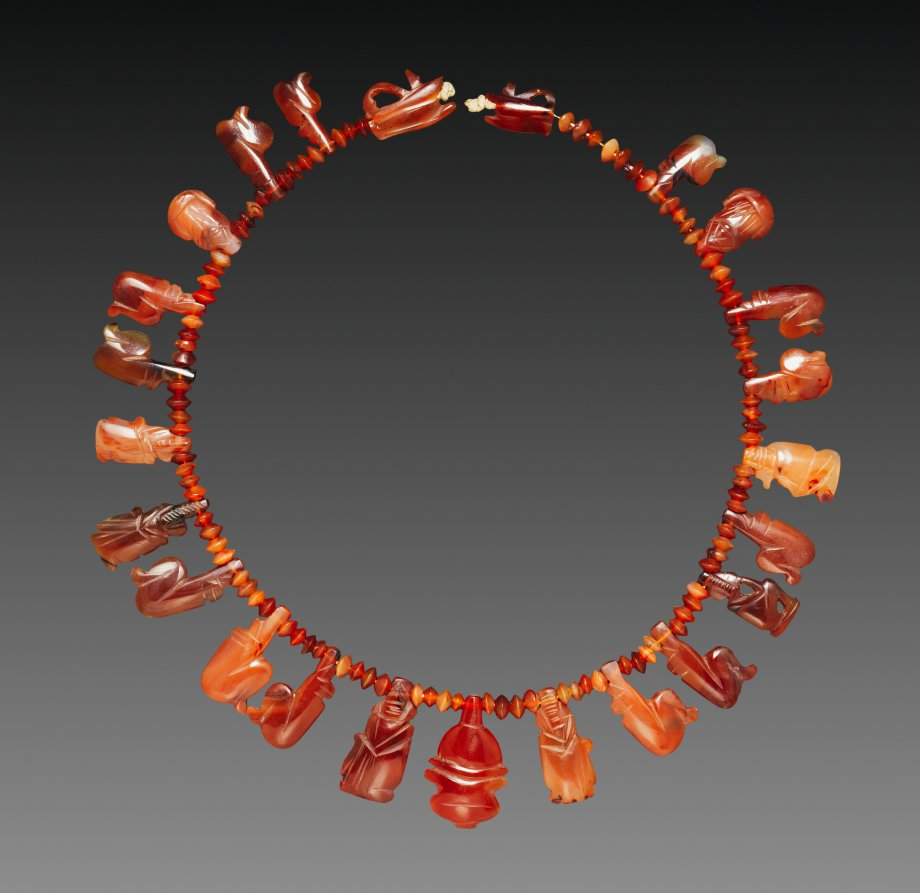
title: Necklace with Amulets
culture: Egypt, Style of late Dynasty 18 but essentially modern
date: early 1900s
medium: carnelian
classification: Jewelry